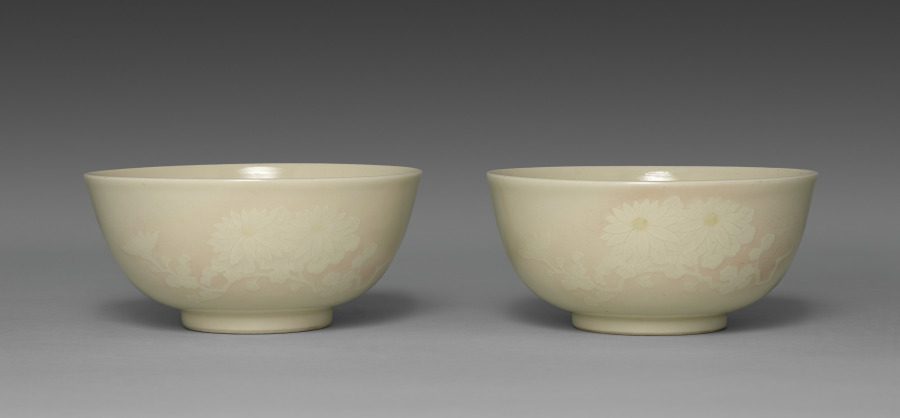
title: Sweets Bowl with Chrysanthemums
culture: Japan, Taishō period (1912–26) or Shōwa period (1926–89)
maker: Seifū Yohei IV (Japanese, 1872–1951)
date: 1914–46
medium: Porcelain with in-glaze and underglaze color and molded design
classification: Ceramic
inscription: 清風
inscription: 成山清風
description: Sweets bowls hold the confections enjoyed when drinking tea. This bowl and CMA 2022.207 offer an important lesson in appreciating Yohei IV’s ceramic practice, for while they have the same design and shape and are made with the same materials, the execution of the pieces makes them entirely different upon close inspection, thereby demonstrating the range of possible production results from a single template. Each bowl has the same composition of two different types of chrysanthemum flowers, one with long, slim, knifelike petals and the other with short, rounded, multilayered petals, shown running around its surface in low relief. The centers of the flowers are painted with yellow under the glaze. Yohei III formulated a number of new underglaze colors during his career, and this is likely one of them. The storage box lid provides abbreviated descriptions of the complex processes used in the surface decorations. It identifies the bowl inside as “Sweets dish with picture of chrysanthemum in kanpakuyū.” The box lid has on its exterior the seal reading “Seizan Seifu” 成山清風, which includes Yohei IV’s style name, but no signature. Instead, a signature is found on the interior of the box lid, accompanied by another seal, this time a gourd-shaped seal reading “Seifu.” The ink inscriptions are in a mode closer to formal script. This bowl, with the signature on the inside of the box lid, stands out for a distinctively bubble-filled glaze with a heavier pink effect, as well as more noticeable yellow at the flowers’ centers and deeper carving in the relief decoration. The design has crept much closer to the rim. A closer look at the delineation of the flower petals reveals that the designs differ at times with respect to which petals appear in front or behind others. The centers of the bases of both bowls are incised with “Seifu” in a manner matching many other works by Yohei IV, although there are slight differences. As one might expect from the other differences in the bowls, the characters on the base of the subtle bowl, CMA 2022.207, are gentler, finishing in a tapering out of the strokes. The strokes on this bold bowl end in triangular pinheads.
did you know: Here Yohei IV used his father’s kanpakuji formula, with underglaze pink for the gradated wash of color surrounding the flowers.